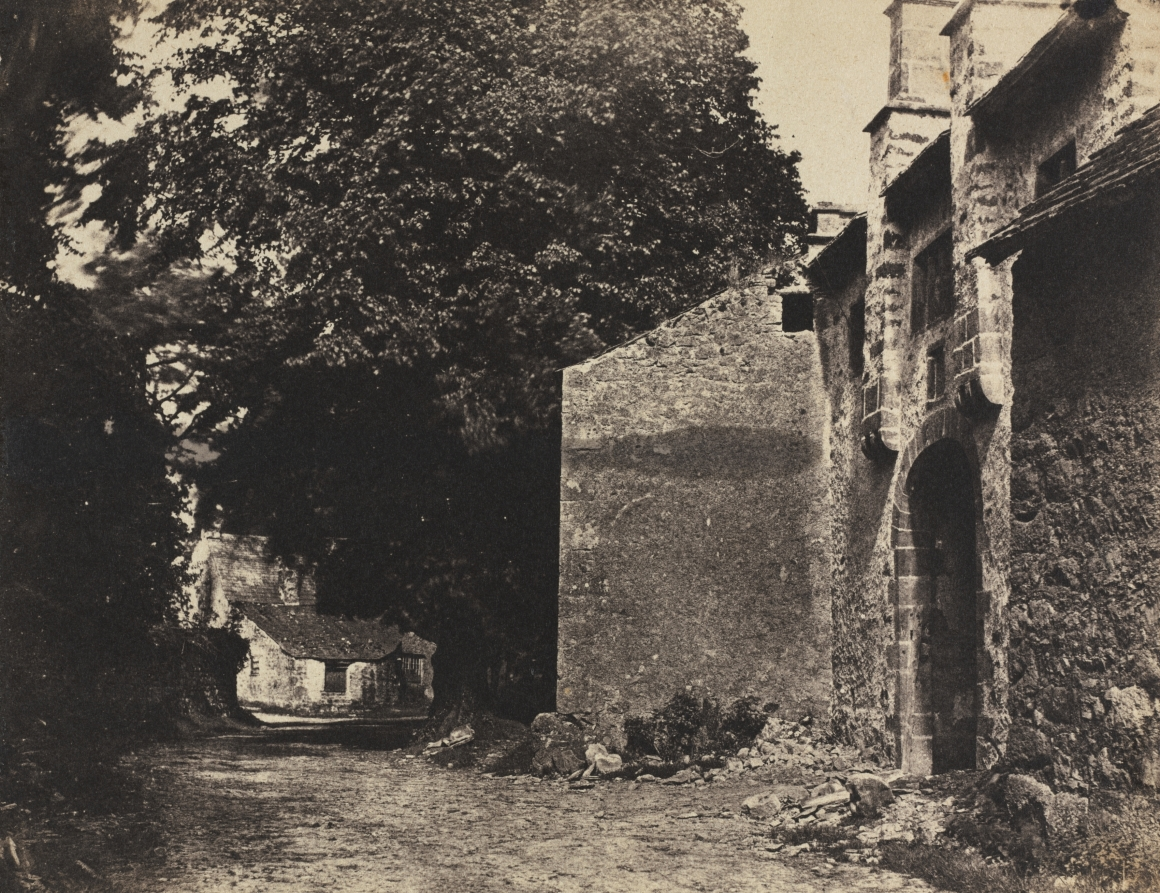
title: Gateway to Borwick Hall, Lancashire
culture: England, 19th century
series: The Photographic Album for the Year 1855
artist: Rev. John Richardson Major (British, 1821–1871)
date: 1855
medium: salted paper print from calotype negative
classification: Photograph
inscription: Written in pencil on verso: "1570.15"; "Major, Borwick Hall"